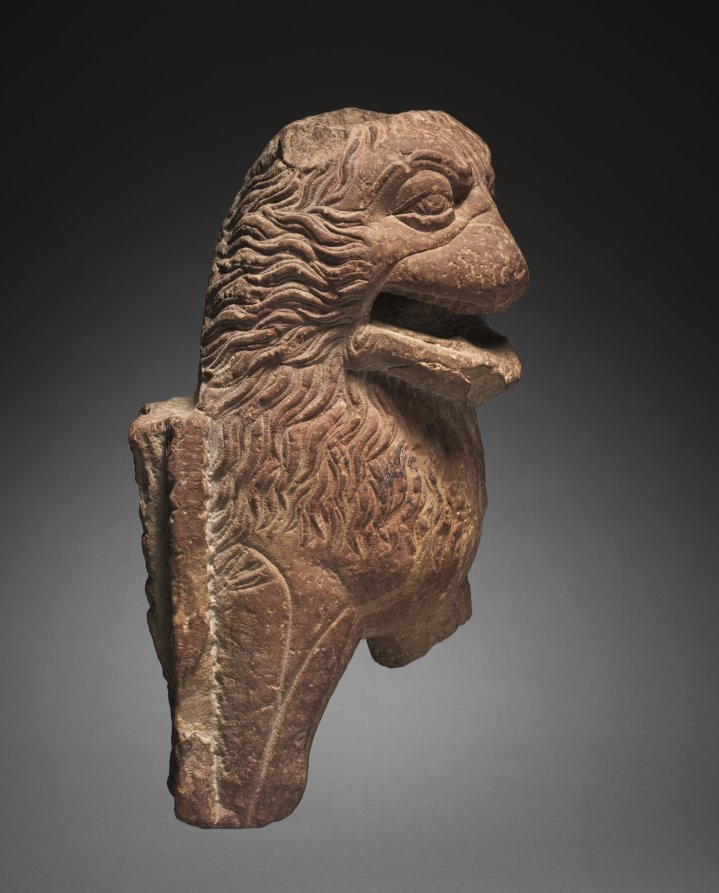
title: Lion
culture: Northern India, Uttar Pradesh, Mathura, Kushan period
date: 100s–200s CE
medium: sandstone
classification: Sculpture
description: Roaring lions such as this have been found on the throne of Kushan kings. Early sculptures of the Buddha also show him seated on a lion throne, and the roar of his teachings (dharma) extends throughout the world.